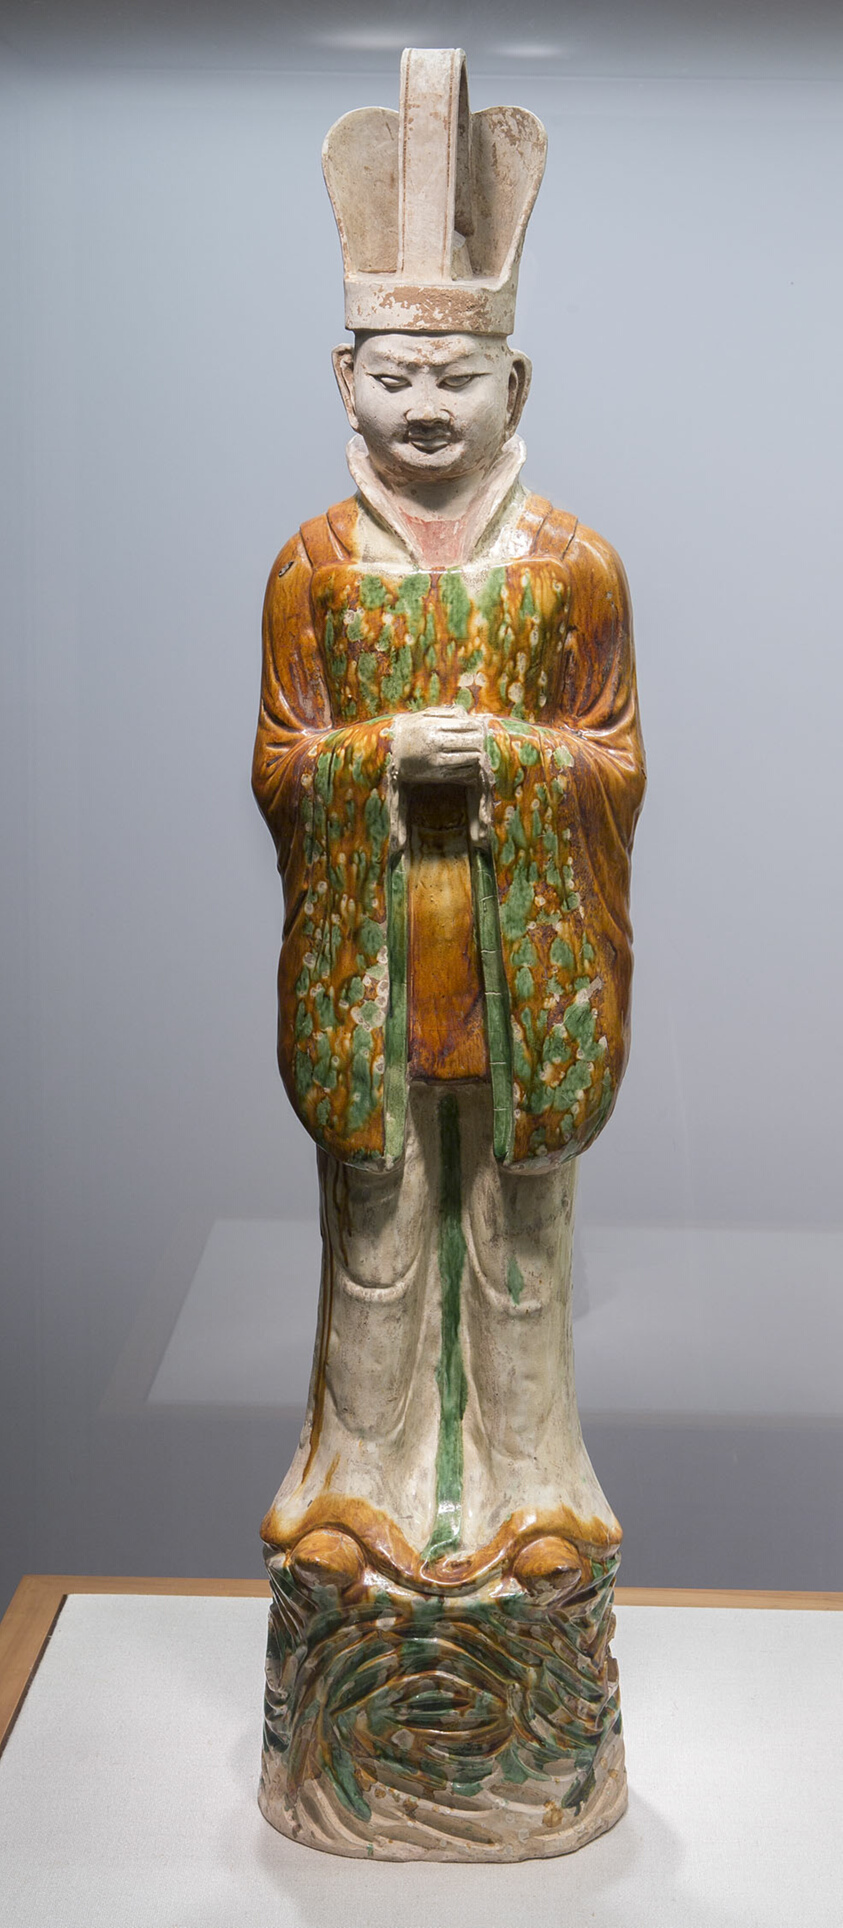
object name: Sculpture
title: Civil Official (Wenguan)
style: Chinese (culture or style)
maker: China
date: Tang dynasty (618–906), 8th century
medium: Earthenware with three-color (sancai) lead glazes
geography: China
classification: earthenware; asian art; ceramics; sculpture